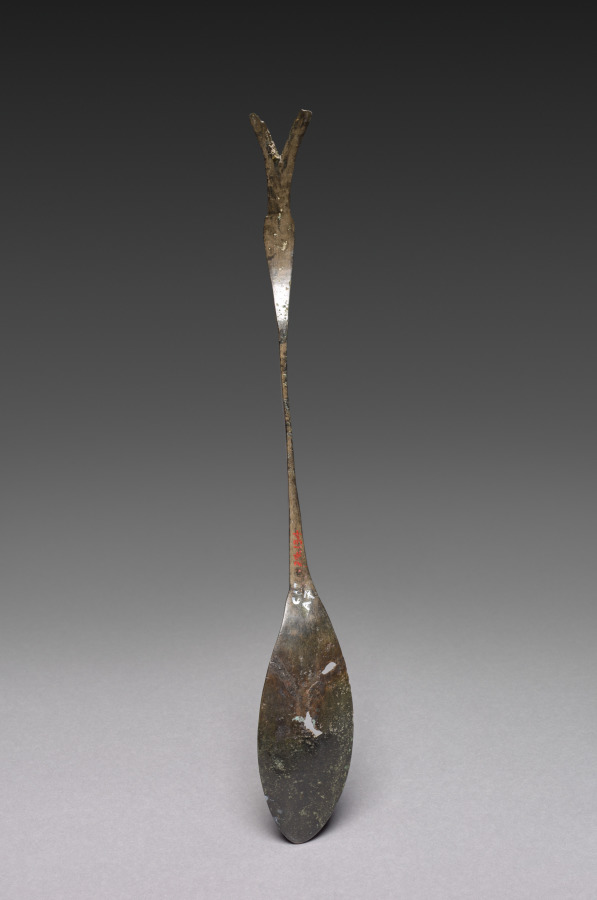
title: Spoon with Fish-Tail Design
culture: Korea, Goryeo dynasty (918–1392)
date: 918–1392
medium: silver bronze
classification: Metalwork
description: Many of Goryeo period spoons like this one feature a curved handle that splits into a jagged fishtail design. This fishtail design is not unique to Korea; it was also widely used in the area under the rule of two non-Han Chinese states: Liao (907–1125) and Jin (1115–1234). These seemingly ordinary objects testify to exciting material interactions between the Goryeo dynasty and non-Han Chinese northern states, which were often omitted from the official records.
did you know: Bronze spoons are the most common burial item. Scholars have proposed that toward the end of the 1300s, Koreans enjoyed meat-based soups more than any other dishes, explaining why spoons became common household items as well as burial goods.